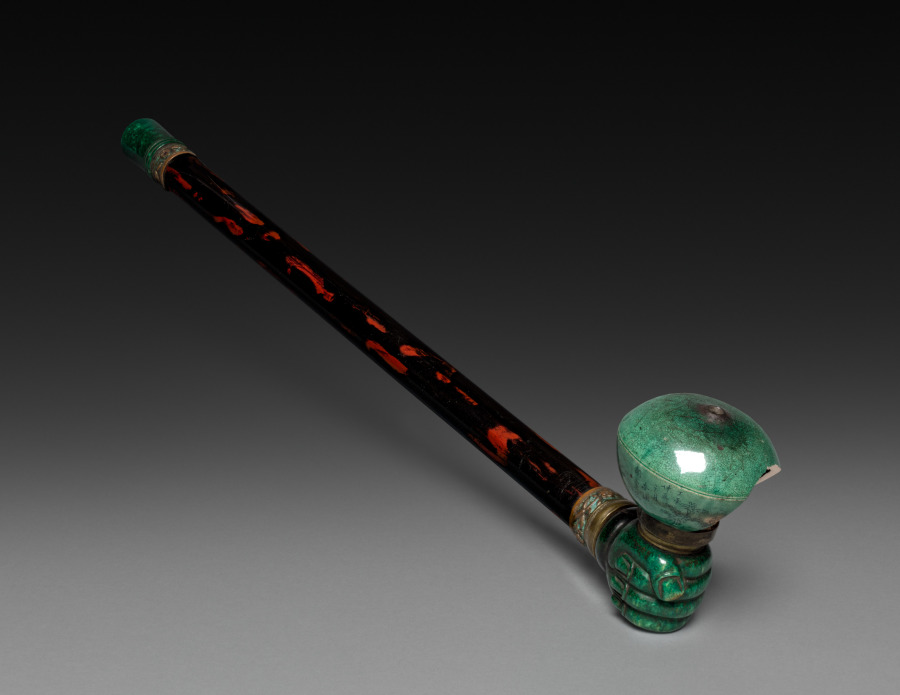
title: Opium Pipe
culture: China, Qing dynasty (1644-1911)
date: 1800s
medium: lacquer, copper ferrules, and porcelain bowl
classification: Miscellaneous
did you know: The stem terminates in the shape of a closed hand holding a green porcelain bowl.